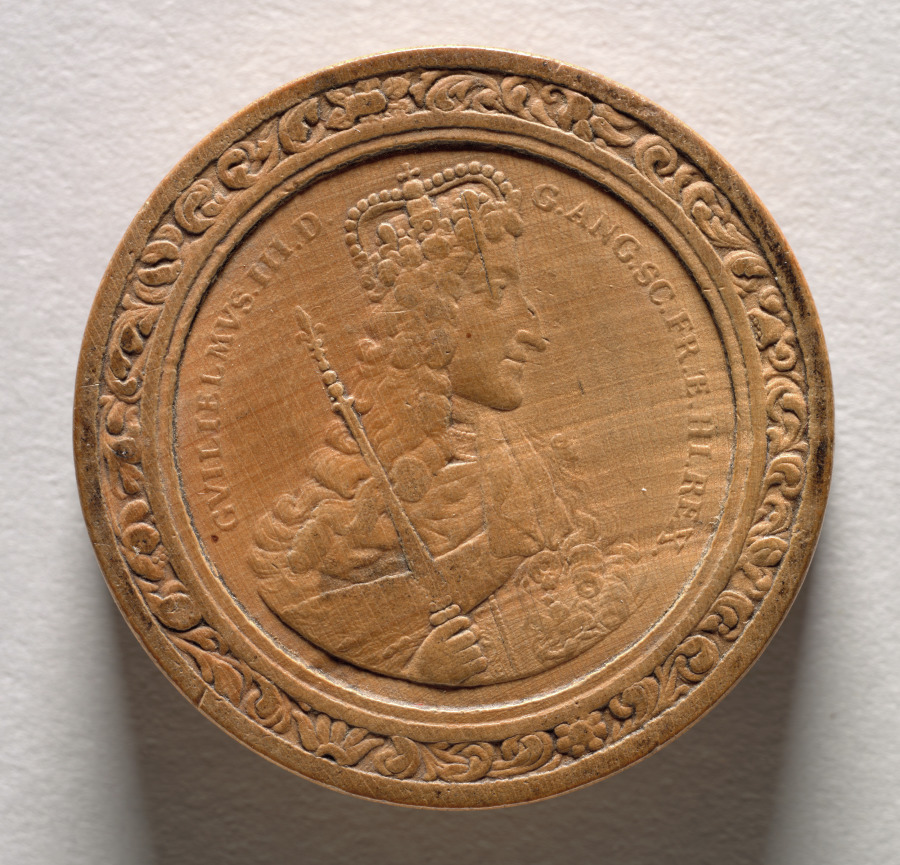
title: Gaming Piece (obverse)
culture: Germany, late 17th-early 18th Century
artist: Martin Brunner (German, 1659–1725)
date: c.1700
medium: wood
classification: Furniture and woodwork